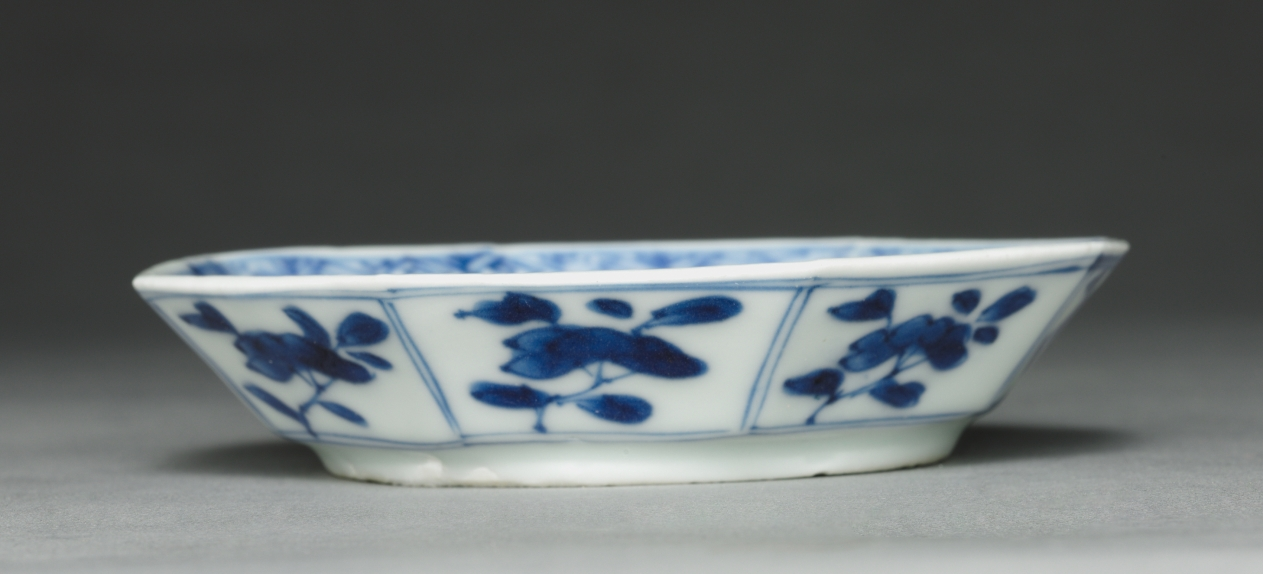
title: Saucer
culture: China, Qing dynasty (1644-1911)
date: c. 1690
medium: porcelain with blue and white decoration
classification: Ceramic